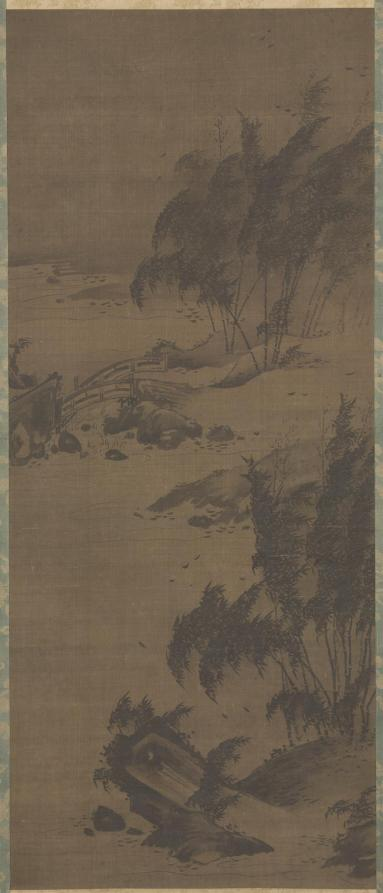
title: Bamboo in Rain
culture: Japan, Muromachi period (1392–1573)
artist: attributed to Genga (Japanese)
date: early 1500s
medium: hanging scroll; ink on silk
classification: Painting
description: East Asian paintings from China, Korea, and Japan were frequently conceived as sets of multiple images. These sets might have been composed for specific palace or temple rooms, or to portray a specific theme, such as the four seasons. Over time, the original intent of such sets is often lost through damage, changes in ownership, or a variety of other reasons. The identity of the artist can also be lost, but then, sometimes, retrieved. This pair of ink paintings has traditionally been labeled as Japanese and attributed to the 16th-century painter Genga. Since there are no seals or signature of the artist on the painting, this attribution was based on comparisons of brush style with paintings known to be by Genga. More recent study indicates that while the 16th century is an appropriate time frame for the pair, the precise cultural identity of the artist is not certain after all. The dark, eccentric shapes of the rocks and bamboo clusters and the dramatic tonal contrasts evident throughout the composition point to either Korean authorship or influence upon a Japanese painter of the period.